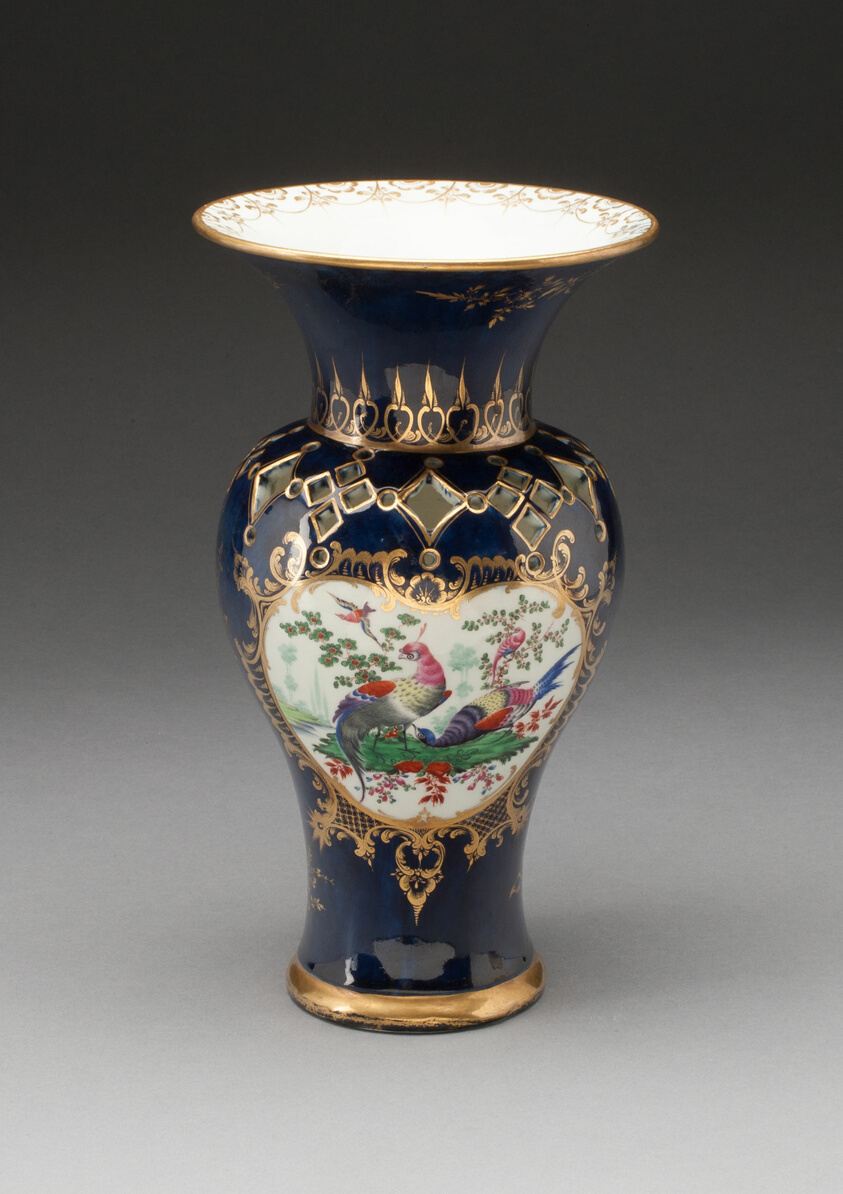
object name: Ceramics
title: Vase (part of a pair)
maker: Worcester Porcelain Factory (Warmstry House Period, 1751–1783); Worcester, England, founded 1751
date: c. 1770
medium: Soft-paste porcelain, underglaze blue, polychrome enamels and gilding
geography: Worcester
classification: vase; european decorative arts; porcelain; vessel; ceramics